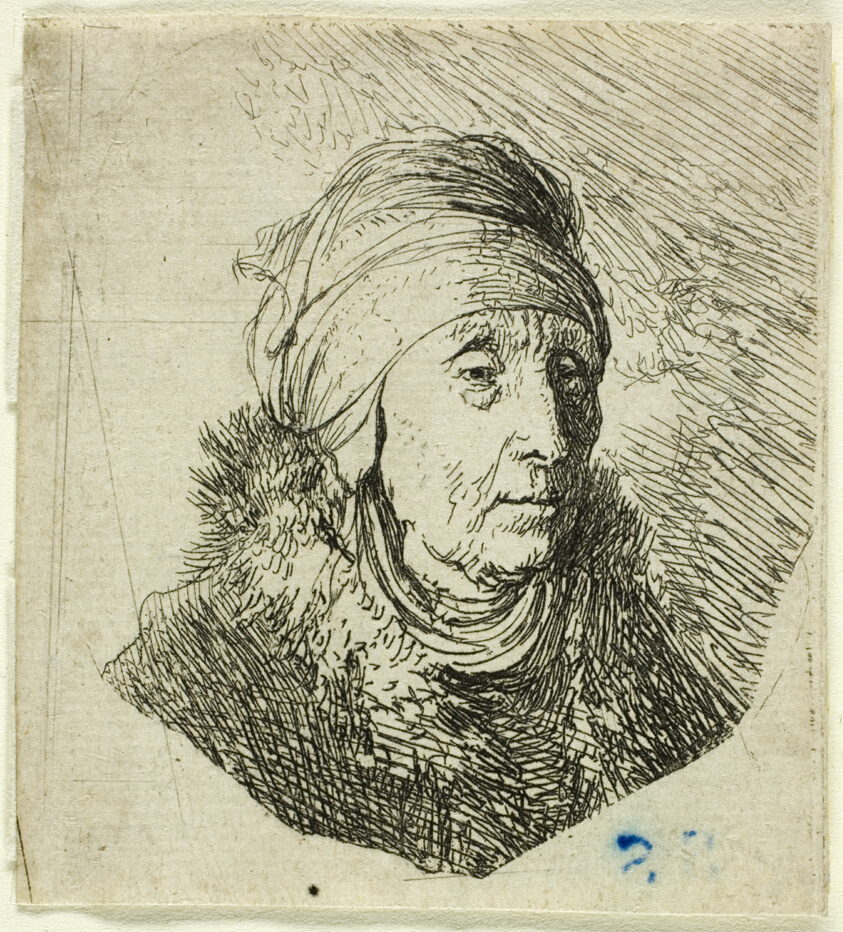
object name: Print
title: Woman with a High Headdress Wrapped Around the Chin: Bust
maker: Rembrandt van Rijn (Dutch, 1606-1669)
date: c. 1630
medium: Etching on paper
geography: Holland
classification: etching; print; prints and drawing; paper